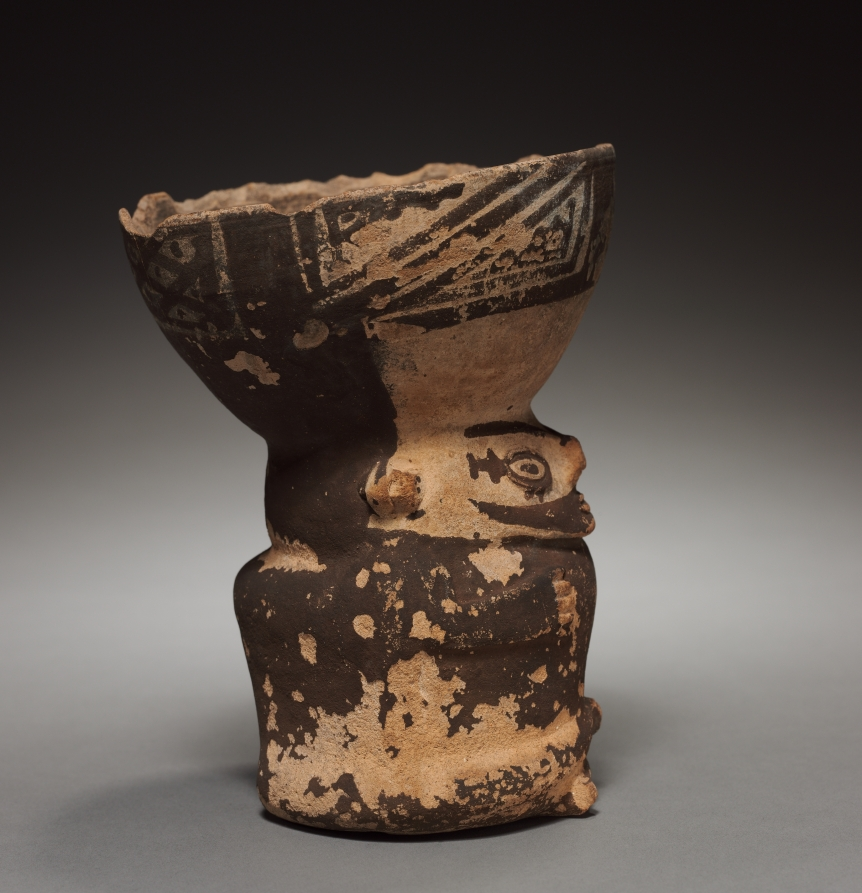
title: Bottle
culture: Peru, Pachacamac, 9th-12th Century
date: 800–1150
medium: pottery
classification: Ceramic